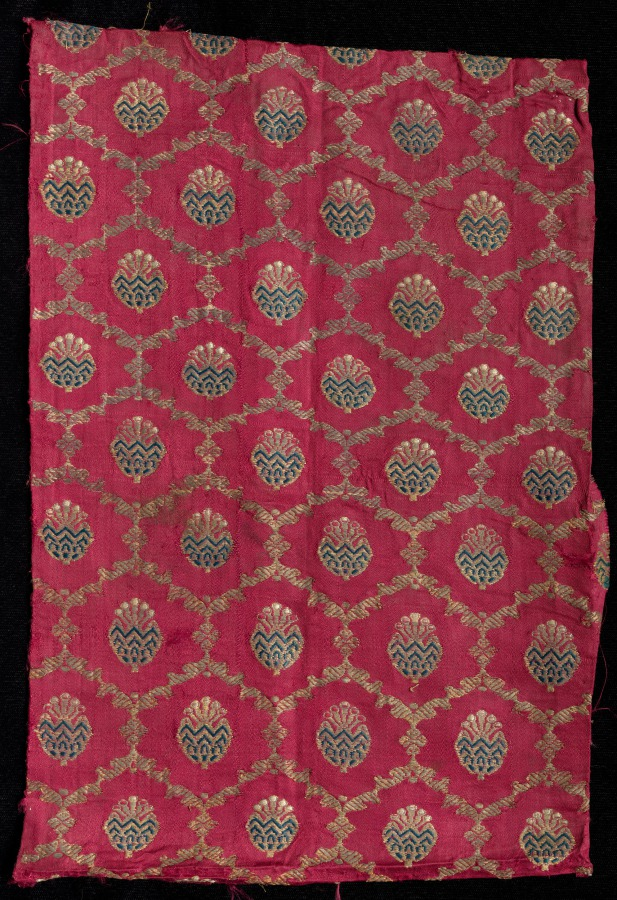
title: Brocade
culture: India, Gulbarga, 19th century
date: 1800s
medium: brocade, "kimkhwab"; silk, cotton, gold thread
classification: Textile